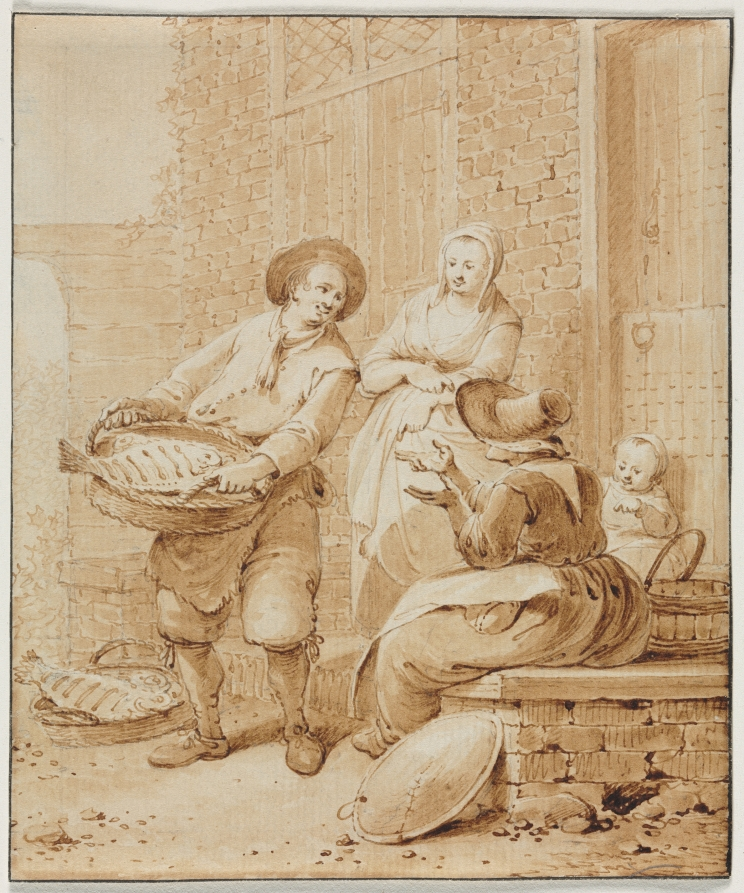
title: The Fish Monger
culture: Netherlands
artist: Hendrik Meijer (Dutch, 1737–1793)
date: second half 18th century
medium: pen and brown ink and brush and brown wash over black chalk; framing lines in black ink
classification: Drawing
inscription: VERSO, signed, lower left, in brown ink: Hd Meyer [d underlined twice] in et fecit ; upper center, in graphite: 9 ; upper left, in graphite: 29 32 1/2 / P. 66